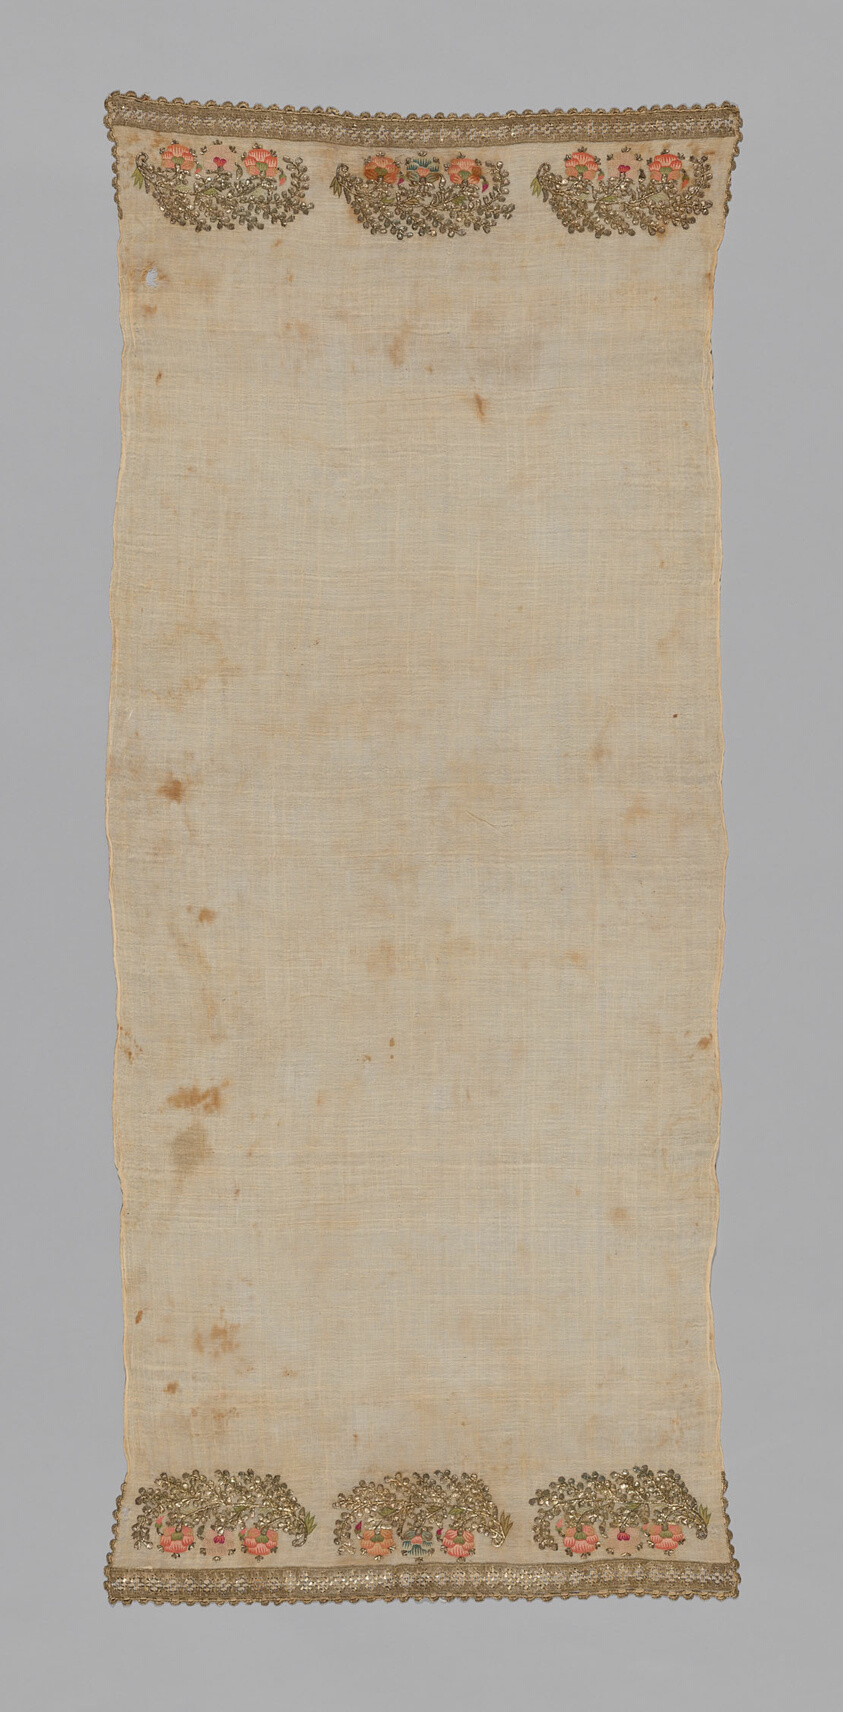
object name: Textile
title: Towel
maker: Turkey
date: 19th century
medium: embroidered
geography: Turkey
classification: textile; weaving; needlework (visual works)